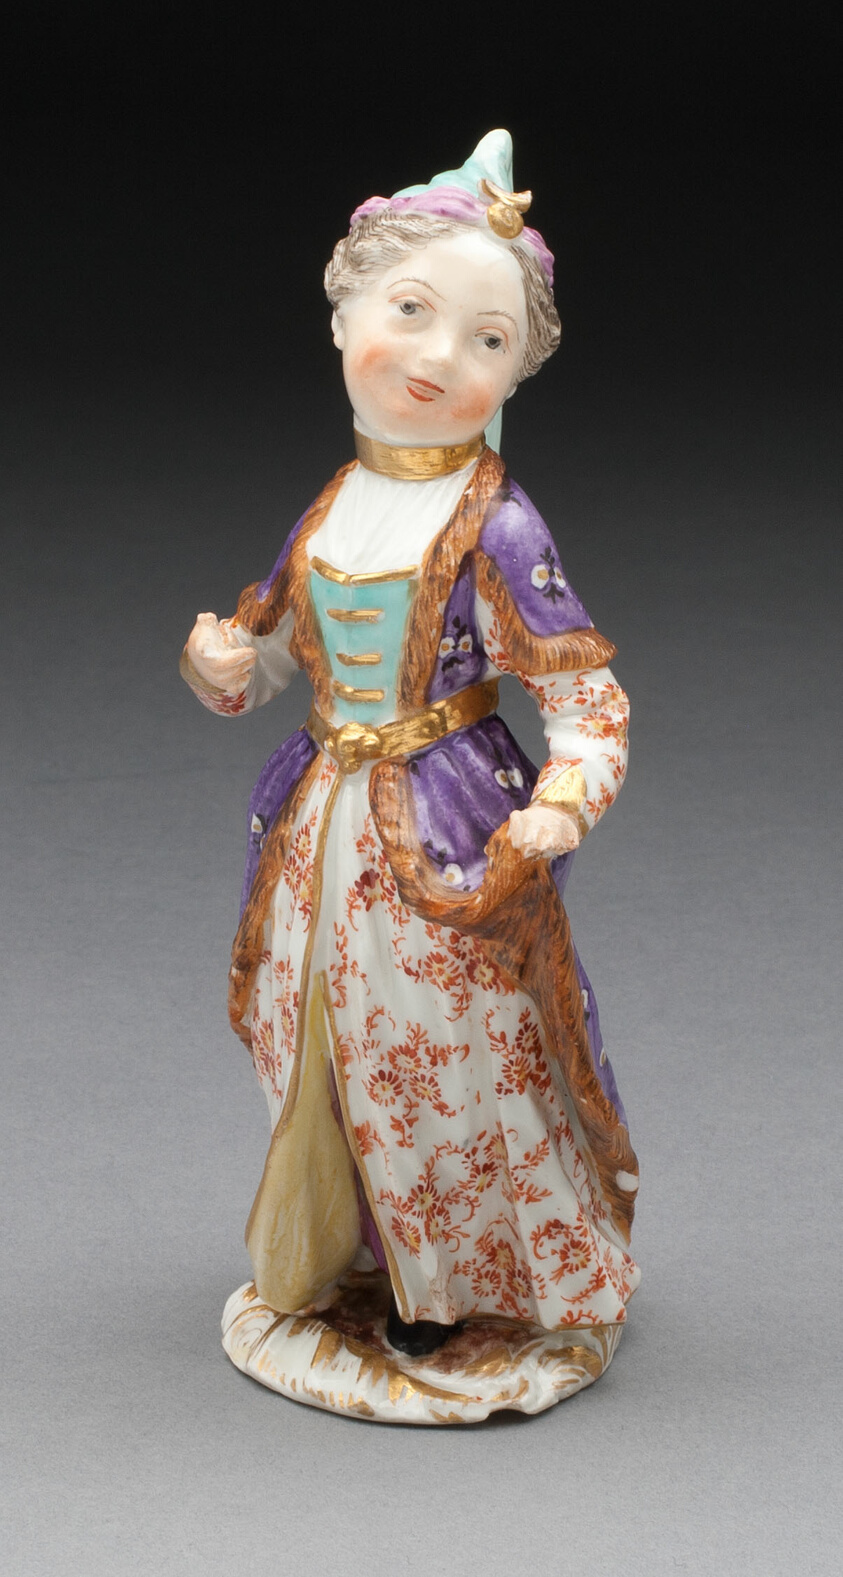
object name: Ceramics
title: Turkish Girl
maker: Germany, Hessen-Kassel (Landgraviate)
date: c. 1770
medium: Hard-paste porcelain, polychrome enamels, and gilding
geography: Hesse-Kassel (Landgraviate) (historic region)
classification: sculpture; porcelain; european decorative arts; ceramics